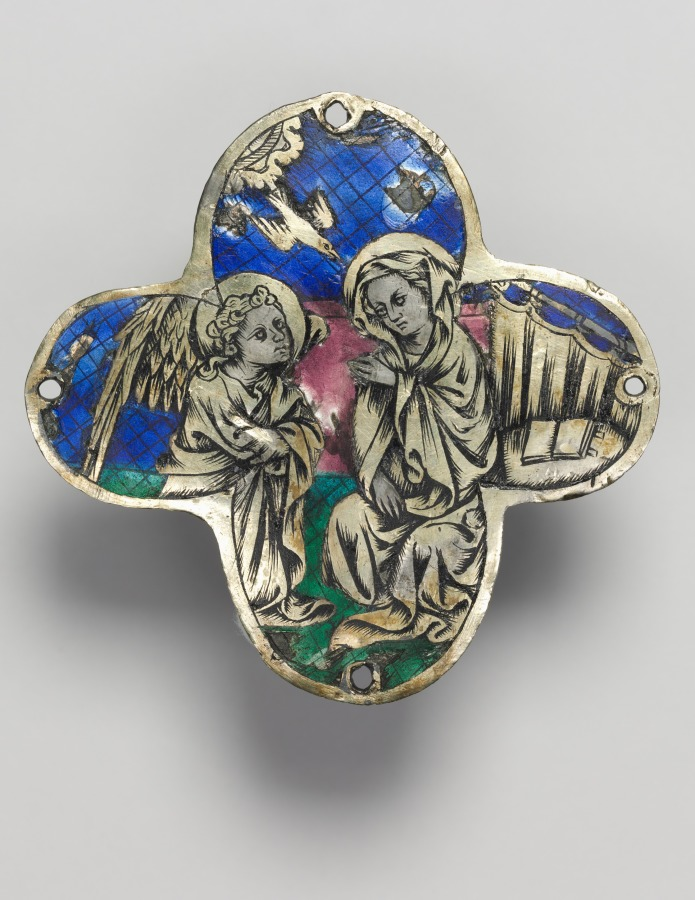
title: Quatrilobed Plaque (pair): The Annunciation and The Descent from the Cross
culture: Spain, Catalonia?, 14th century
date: c. 1350–1400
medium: translucent enamel (basse-taille) on silver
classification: Enamel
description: These plaques were probably originally placed at the end of the arms of a processional cross. They are decorated in an enameling technique called basse-taille in which colorful translucent enamel pastes are fused over an engraved and chased silver plaque.